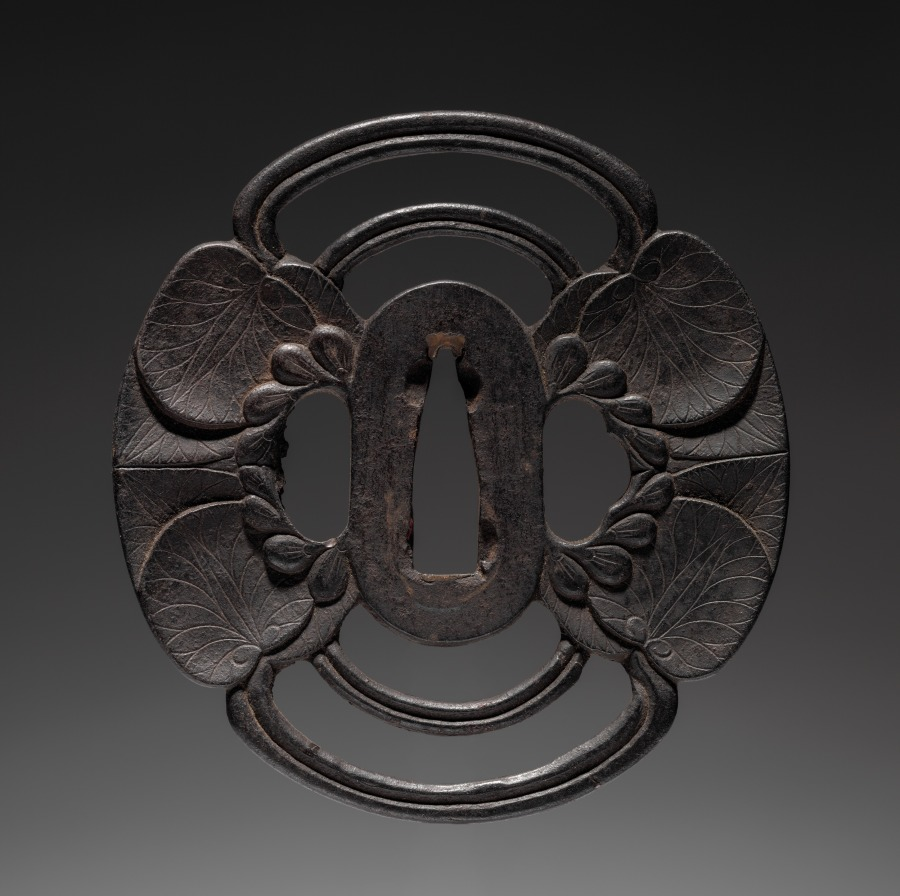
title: Sword Guard (Tsuba)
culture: Japan, Edo period (1615–1868)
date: c. 1800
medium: iron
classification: Arms and Armor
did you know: This sword guard may be by the Chosun school.